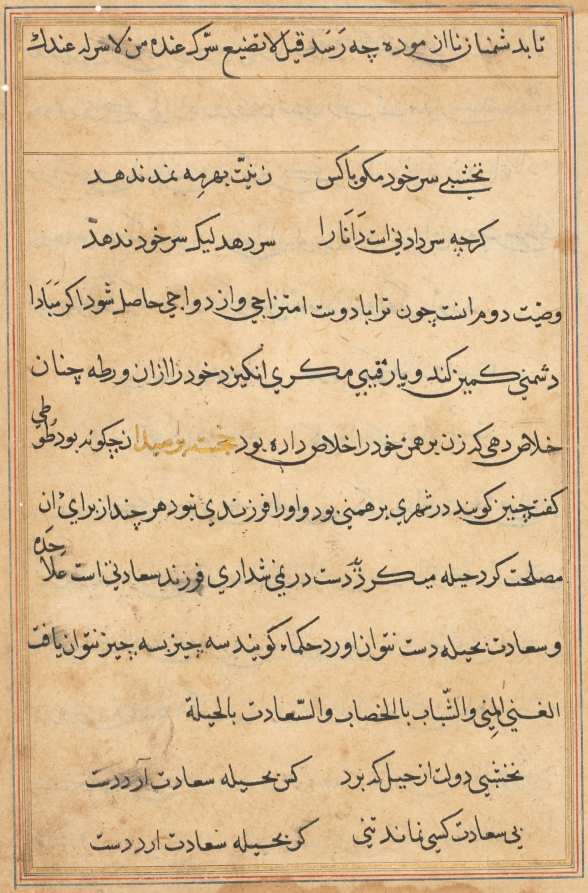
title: Page from Tales of a Parrot (Tuti-nama): text page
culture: Mughal India, court of Akbar (reigned 1556–1605)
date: c. 1560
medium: gum tempera, ink, and gold on paper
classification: Painting